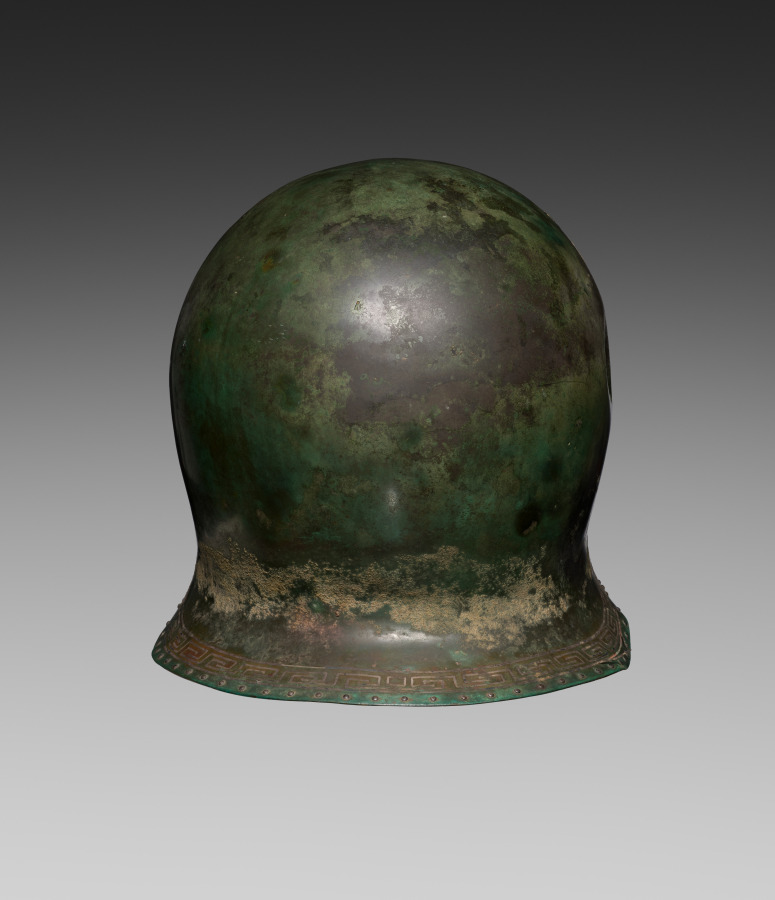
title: Corinthian Helmet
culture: Greece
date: 500–475 BCE or modern (before 1926)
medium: bronze with silver inlay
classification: Arms and Armor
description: Probably cast and then hammered into shape, this bronze helmet belongs to a type known as Corinthian, with almond-shaped eye holes, large cheekpieces, and a wide nose guard. Its significant weight raised early suspicions about authenticity, and although a 1928 technical examination found no conclusive evidence of forgery, scholars have continued to doubt its antiquity. Unusual details include the intact rivets, or metal fasteners, meant to secure liners; usually only their holes survive. The dueling warriors and inlaid palmette above the brow also find few parallels, and the silver meander pattern is unique. Most recently, a 2024 analysis found that both the copper and silver alloys of the helmet differ significantly from those expected in an ancient Greek helmet.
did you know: This helmet is very heavy—2.56 kilograms (5 lbs., 10 oz.), compared to average ancient helmets of 1.2–1.6 kilograms (about 3 lbs.).